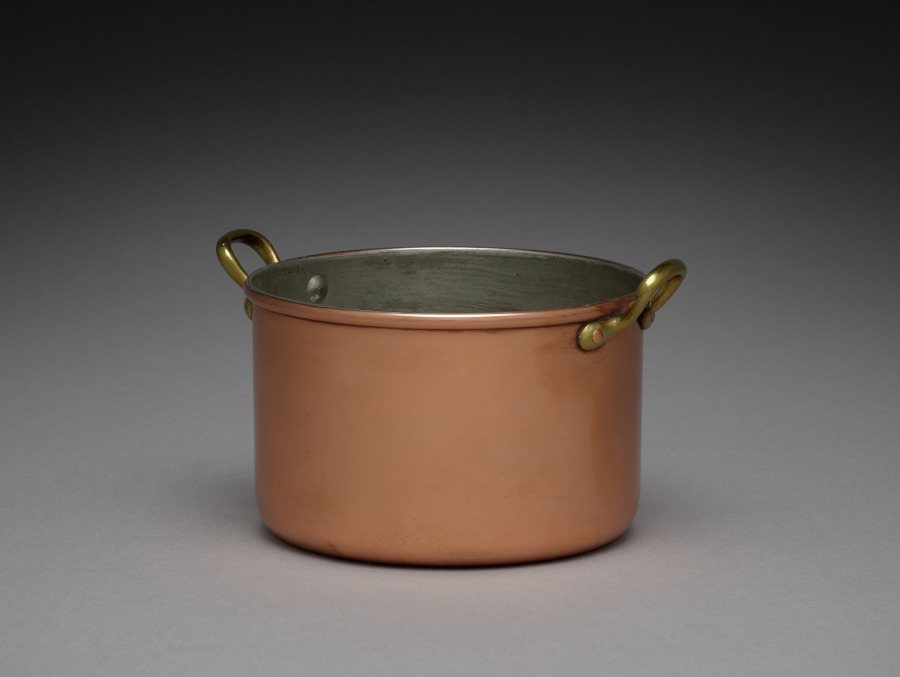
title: Pot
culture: Russia, St. Petersburg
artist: firm of Peter Carl Fabergé (Russian, 1846–1920)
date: 1914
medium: copper with brass handles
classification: Metalwork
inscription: inscribed: War (in Cyrillic), 1914r.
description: As Russia entered the First World War, austerity and economy settled into the fabric of life even among wealthy aristocrats and nobility. Not only were precious materials such as gold, silver, and gemstones hard to procure, but such luxury seemed out of place when so many men were dying at the front. Fabergé contributed to the war effort by making shells, casings, and other munitions out of brass and copper. He also made cookware, such as this small soup pot, to be sent to the front lines with provisions tucked inside. However, these simple forms only looked affordable. They were still a luxury only the wealthiest families could afford to send to their sons.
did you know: This copper soup pot was sent to the front lines filled with provisions during the First World War.